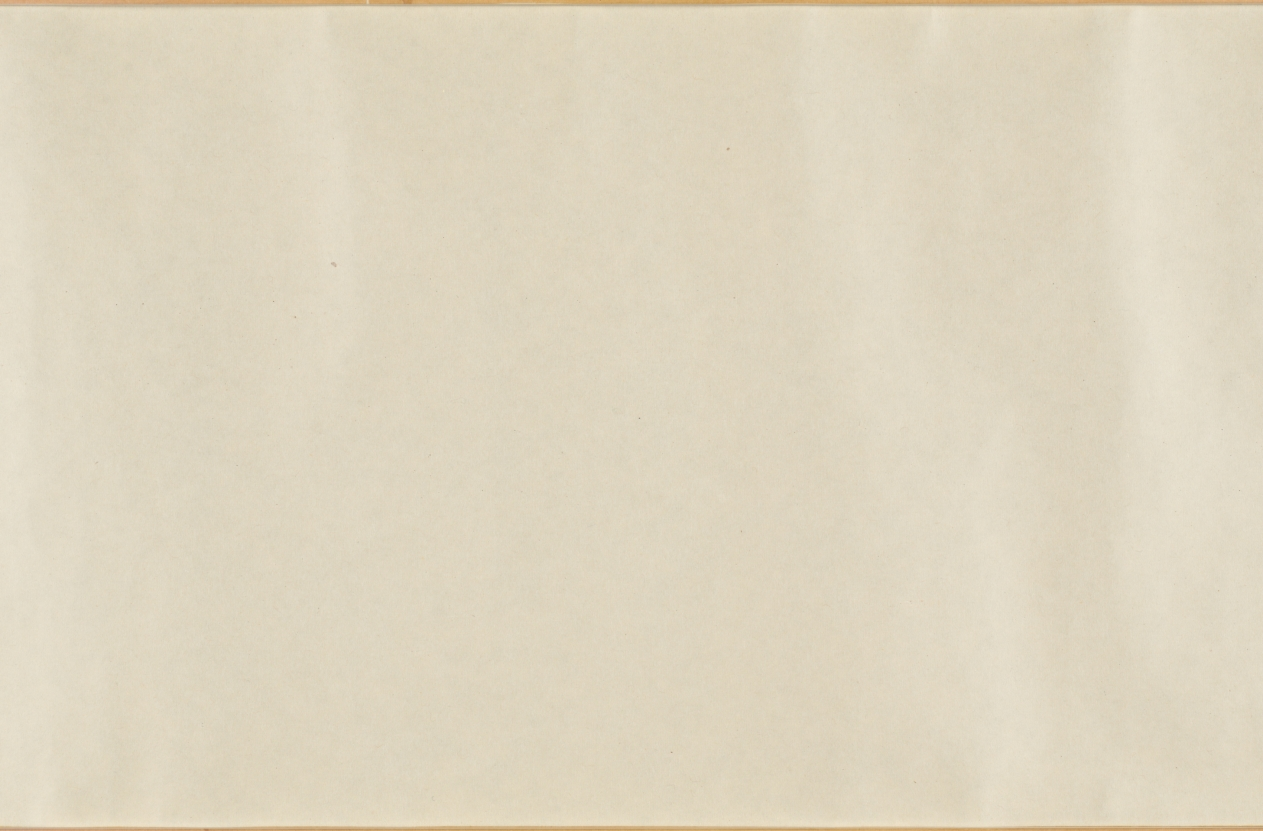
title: Selections from the New Collection of Japanese Poems from Ancient and Modern Times (Shinkokin wakashū) with Printed Designs of Chinese Lions and Crab Finger Grass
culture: Japan, Edo period (1615–1868)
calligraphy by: Hon'ami Kōetsu (Japanese, 1558–1637)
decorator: Tawaraya Sōtatsu (Japanese, c. 1570–c. 1640)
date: early 1600s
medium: handscroll; ink, gold, and silver on paper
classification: Calligraphy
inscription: Seal: 光悦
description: Hon’ami Kōetsu was a calligrapher and craftsman who frequently collaborated with the painter Tawaraya Sōtatsu, considered the first master of the Rinpa school. Kōetsu brushed seven poems from the autumn section of a poetry anthology onto dyed paper with motifs designed and printed in gold and silver by Sōtatsu.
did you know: Before becoming a master painter of screens, Tawaraya Sōtatsu painted fans.